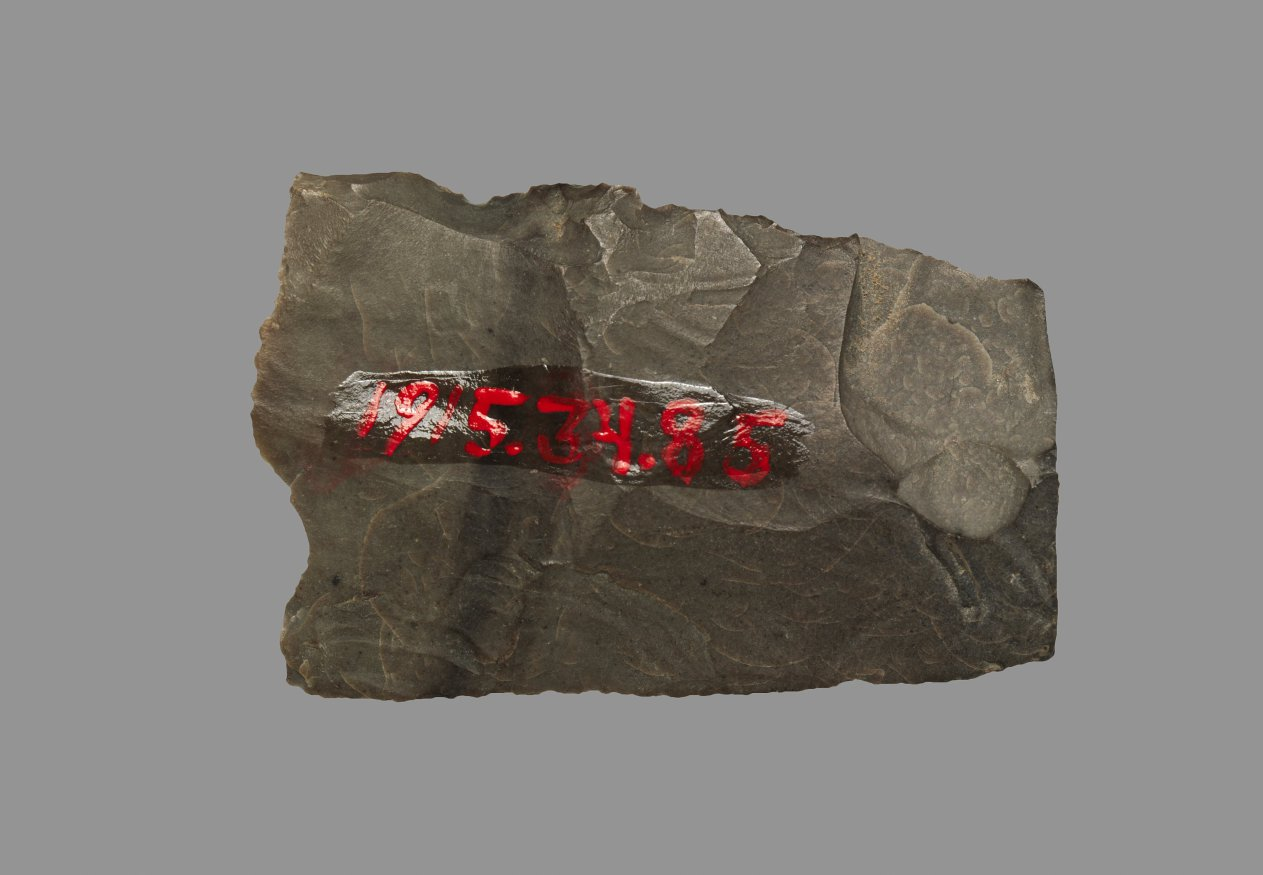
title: Sickle Blade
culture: Egypt, Middle Kingdom (2040–1648 BCE), Dynasty 12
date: 1980–1801 BCE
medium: flint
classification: Implements